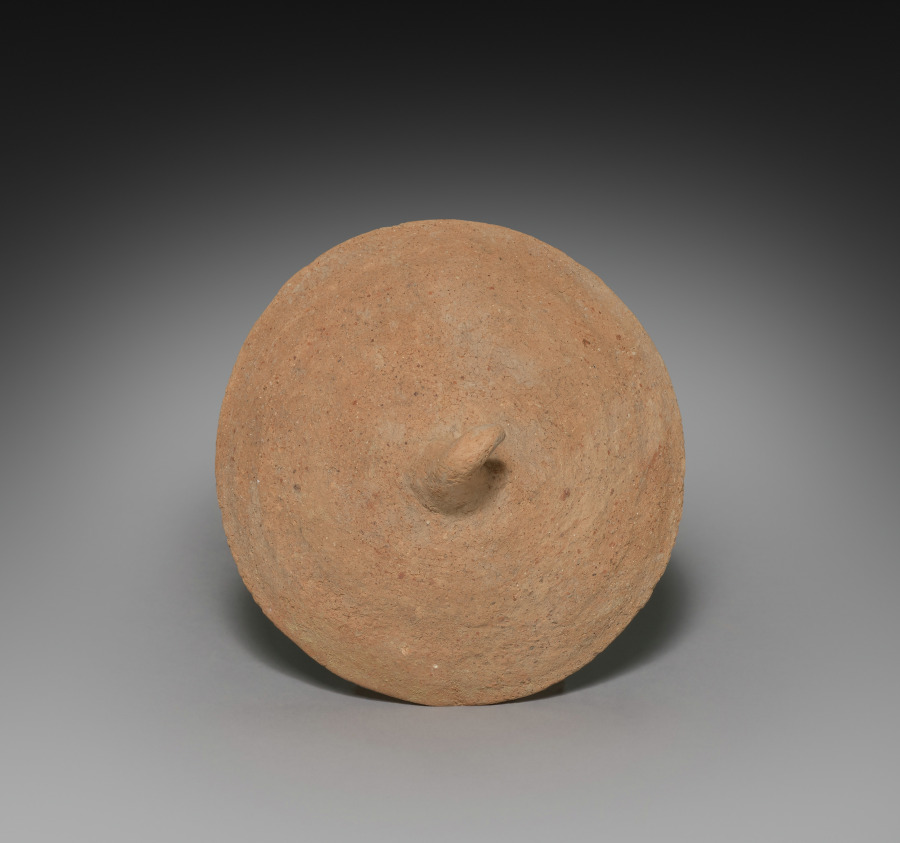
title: Covered Jar with Horn Handle (lid)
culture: Korea, Silla (57 BC-935) or Kaya (AD 42-562) period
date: 400s–500s CE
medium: red earthenware with applied red slip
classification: Ceramic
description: Early earthenware from the Three Kingdoms period (57 BCE–668) became widely utilized as agriculture and religion grew to be essential elements in sustaining society and its systems. The clay jars of different sizes and shapes on display were made for the following purposes: some were used to store harvested grains and seeds, some, especially lidded ones such as this example, to preserve cremated remains, and some to serve offerings in rituals.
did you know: Closed kilns built on hillsides became widely used for producing this type of pottery vessel in Korea during the Three Kingdoms period.